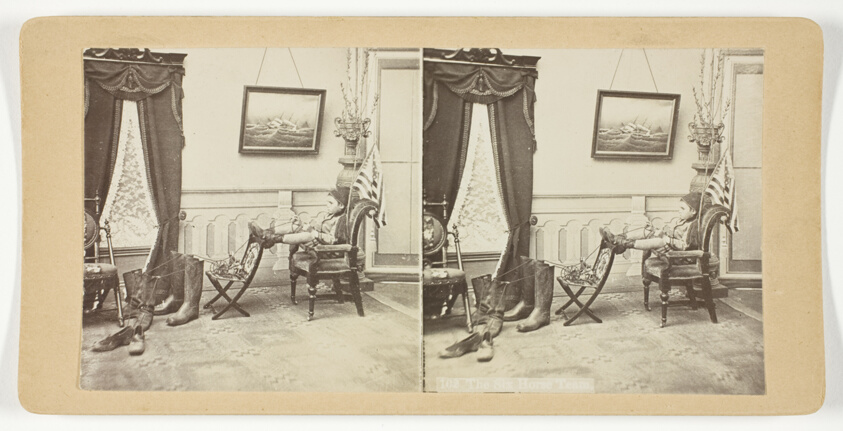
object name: Photograph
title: The Six Horse Team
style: 19th century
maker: Artist unknown; American, late 19th century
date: 1875/99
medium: Albumen print, stereo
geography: United States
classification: photography; photograph